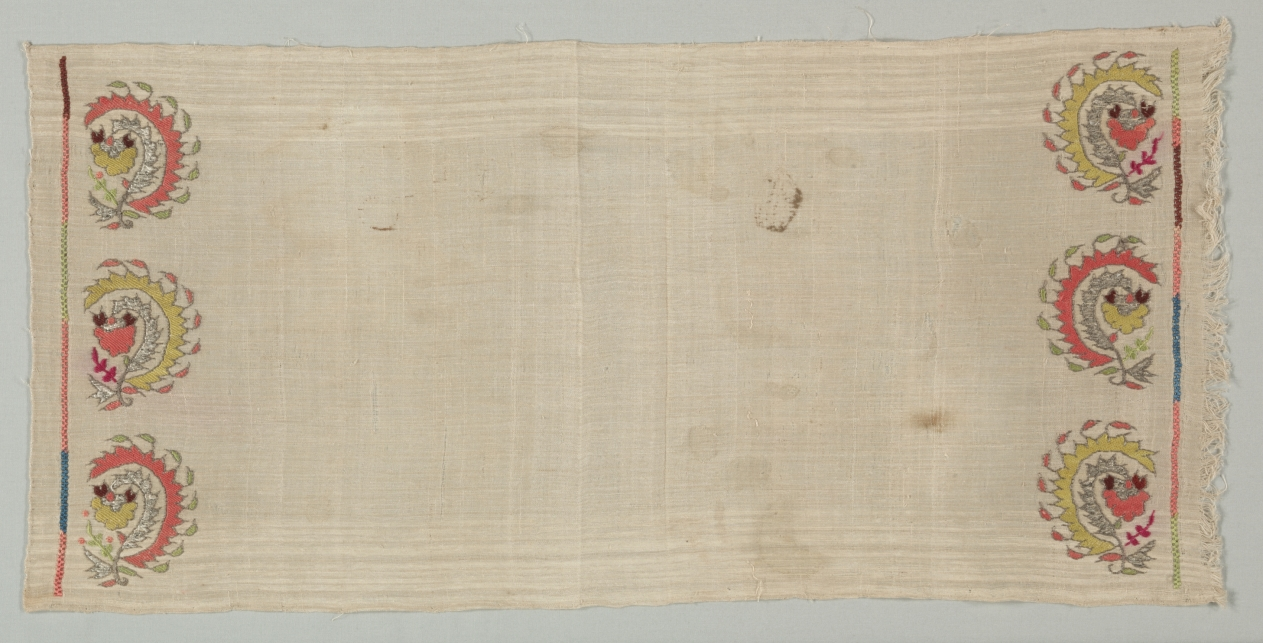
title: Embroidered Towel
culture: Turkey, 19th century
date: 19th century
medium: embroidery: silk and metal strips on linen tabby ground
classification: Embroidery